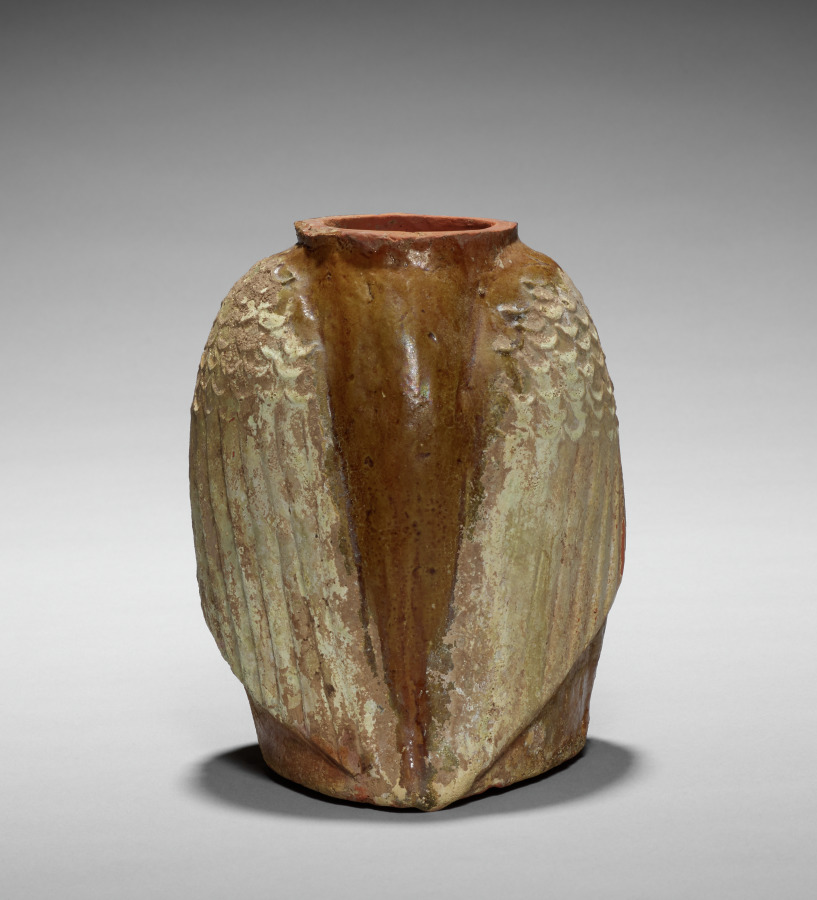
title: Owl-shaped Jar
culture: China, Henan province, Western Han dynasty (206 BCE–8 CE)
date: 206 BCE–9 CE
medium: Amber-brown glazed low-fired pottery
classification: Ceramic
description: Pottery vessels in the shape of owls were made since Neolithic times and throughout the Bronze age. These jars in the form of vigilant owls may have provided a tomb occupant with grain in the afterlife. However, the meaning of these mysterious birds and the association of the owl motif with burial sites in China is not fully understood.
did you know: The jar cover is modeled in the shape of an owl's head.